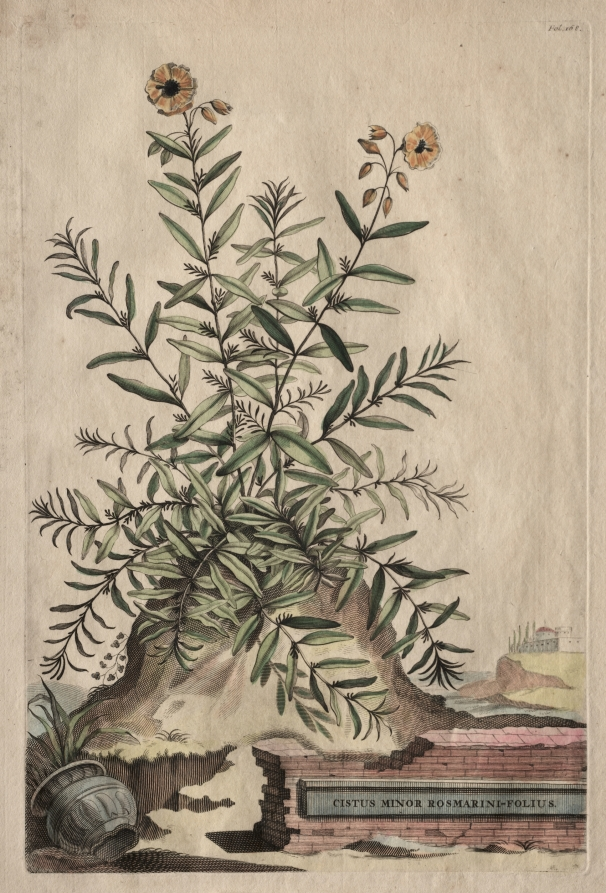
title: Phytographia Curiosa: Cistus Minor Rosmarini-Folius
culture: Netherlands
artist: Abraham Munting (Dutch, 1626–1683)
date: c. 1651–83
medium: etching, hand colored with watercolor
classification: Print